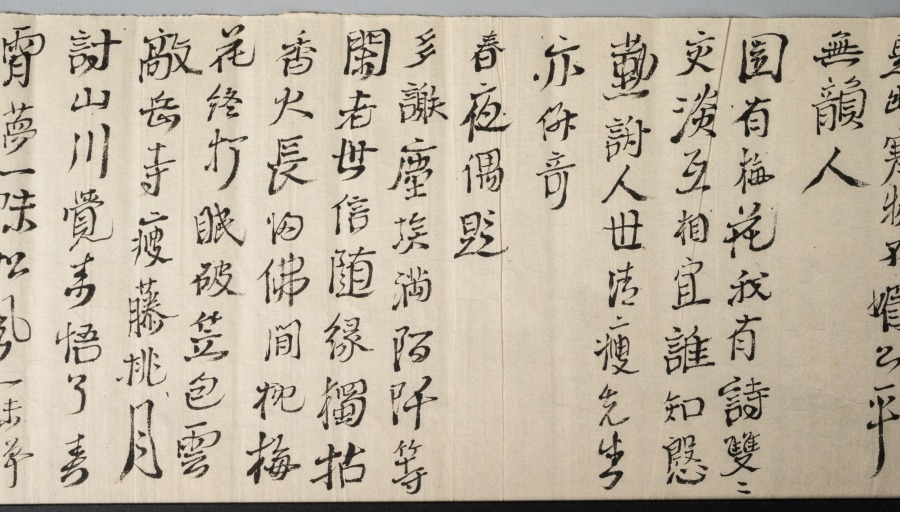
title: Happy Forest, from Water Margin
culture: Japan, Edo period (1615–1868)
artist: Matsumura Goshun (Japanese, 1752–1811)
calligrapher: and Amenomori Shōteki (Japanese, 1731–1786)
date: late 1700s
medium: hanging scroll; ink and color on paper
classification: Painting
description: The Chinese literary classic Water Margin is set in the 1120s and tells the story of 108 outlaws who first rebel against the government and then join forces with it. This painting depicts an episode in which hero Wu Song reclaims the tavern Happy Forest for its rightful owner, the prison warden’s son, Shi En. To prepare for the fight, Wu Song drinks a lot of wine. The painting was inscribed with a quote in which an ally describes Wu Song’s fighting style. It reads as follows: Where his twin fists rise, clouds and thunder roar, When his flying kick comes, wind and rain tremble.